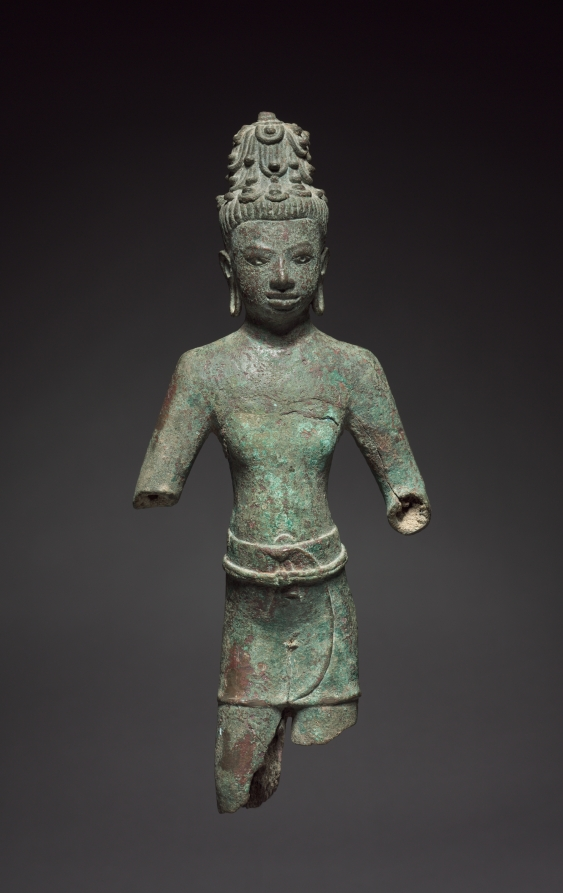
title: Bodhisattva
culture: Northeastern Thailand, Khorat Plateau, Buriram Province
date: 700s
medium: bronze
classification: Sculpture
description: This rare image survives from the early phase of Buddhist sculpture in Southeast Asia. Made in what is known as the Pra Khon Chai style, it has the characteristic sensitive expression, slender physique, and looped locks of hair. The broken limbs reveal the clay core over which the bronze was cast using the lost-wax method.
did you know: This sculputre was reportedly found as part of a group, some of which are much larger in scale.